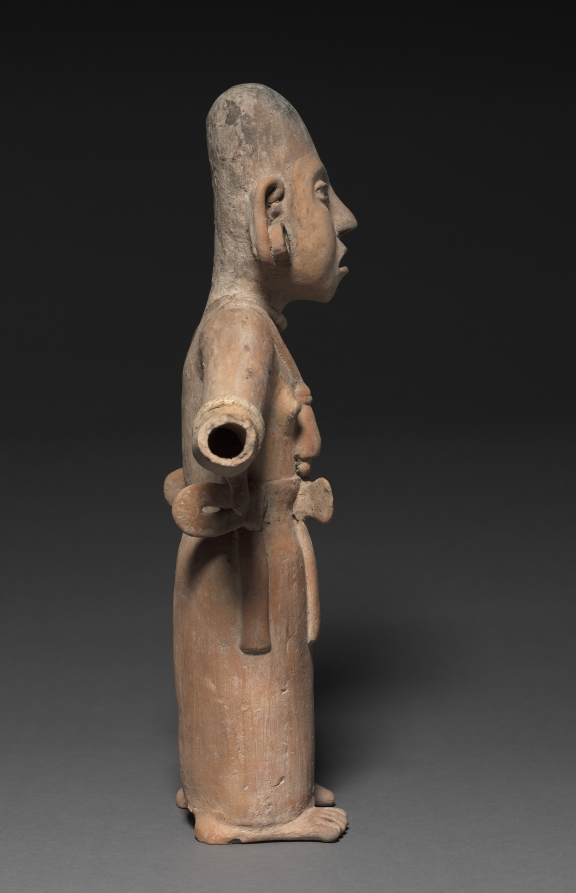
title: Female Figure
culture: Mexico, Southern Veracruz, Limon, Remojades Monumental Sculpture type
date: 200–500 CE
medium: pottery with burnished buff slip and asphalt paint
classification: Sculpture